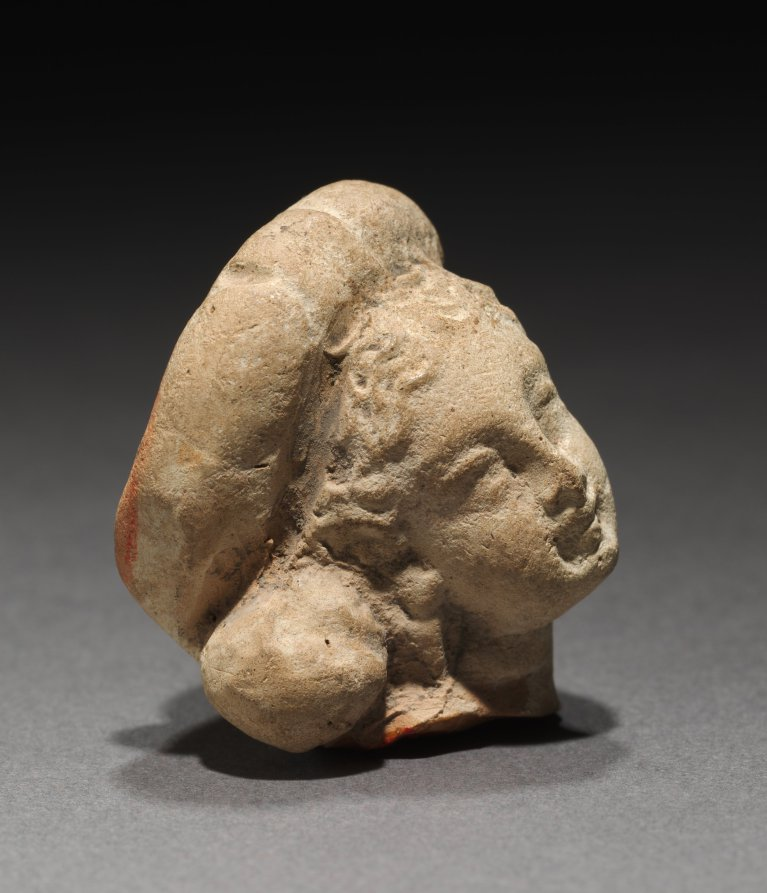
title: Head of a Goddess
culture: Parthian Empire (247 BCE–224 CE)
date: 1–200 CE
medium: terracotta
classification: Sculpture